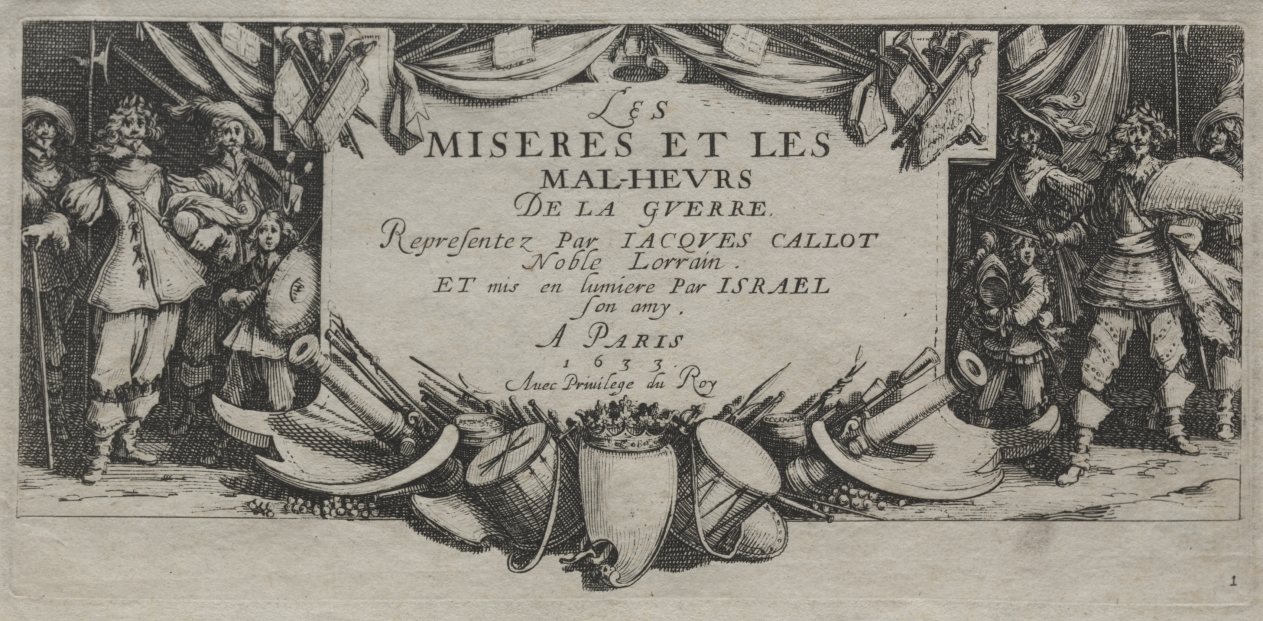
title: The Large Miseries of War: Title Page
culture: France, 17th century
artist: Jacques Callot (French, 1592–1635)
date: 1633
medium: etching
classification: Print